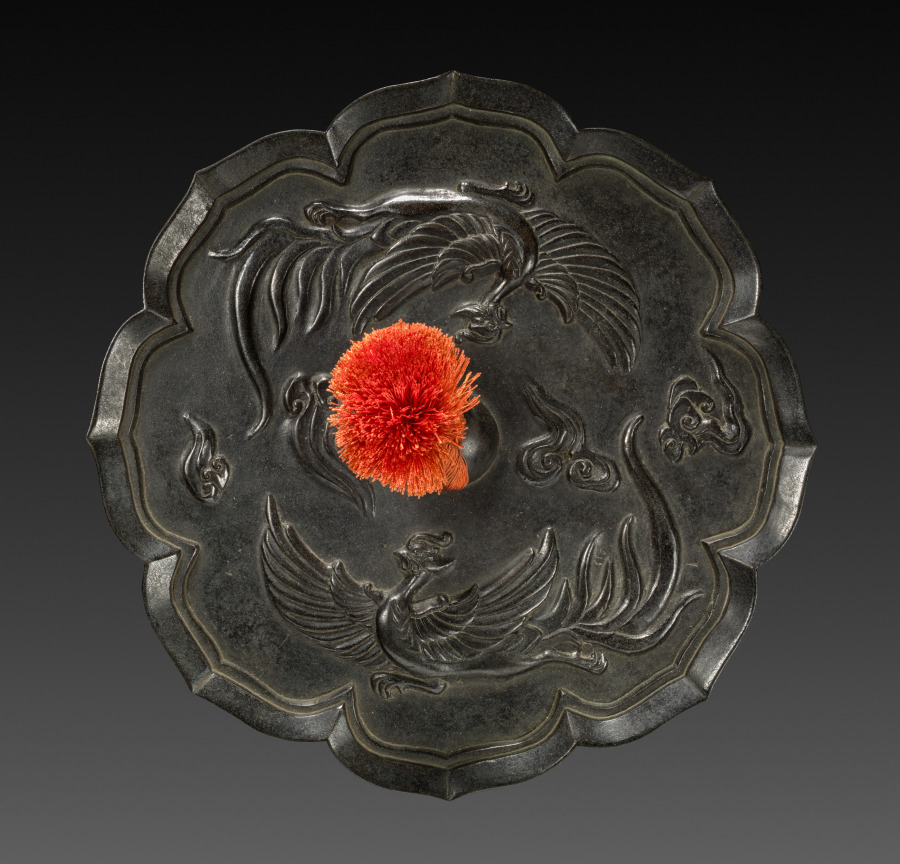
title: Mirror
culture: Japan, Heian period (794–1185)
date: 794–1185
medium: bronze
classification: Metalwork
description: The polished side of this eight-pointed mirror has an incised design of the kami Takemikazuchi riding on a deer from Kashima to Mount Mikasa, where he takes up residence. Although the mirror itself could have been produced as early as the 1300s, the incised line work has a fresh quality more consistent with later works, and the image may have been executed as late as the 1600s–1800s. Unlike most painted images of the episode, this incised one includes neither the sakaki tree branch supporting the Buddhist manifestations of the five Kasuga kami, nor Takemikazuchi’s companions. The back of the mirror has a design of two phoenixes.